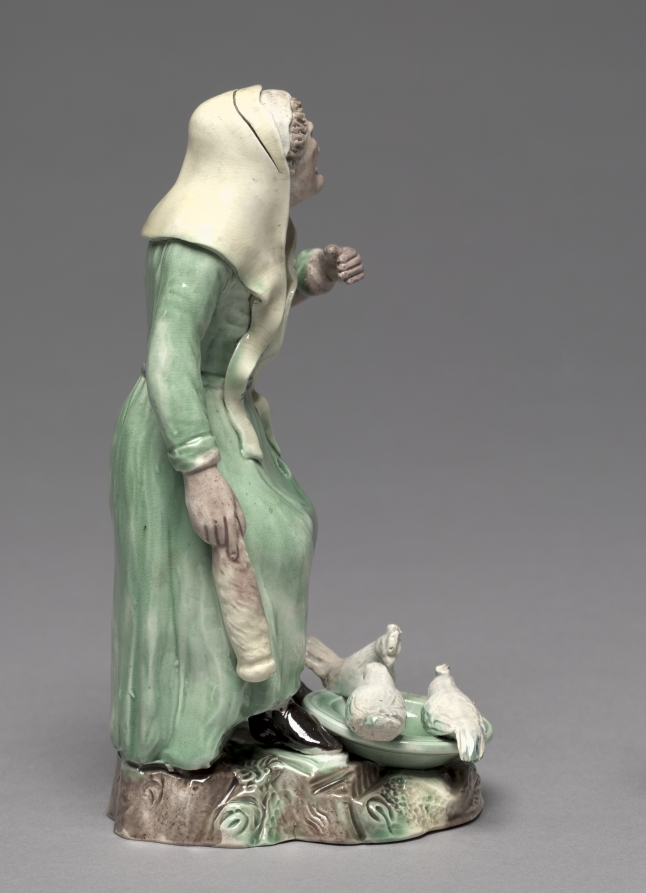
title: Old Woman Feeding Chickens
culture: England, Staffordshire, 18th century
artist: Staffordshire Factory (British)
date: c. 1770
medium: earthenware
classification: Ceramic